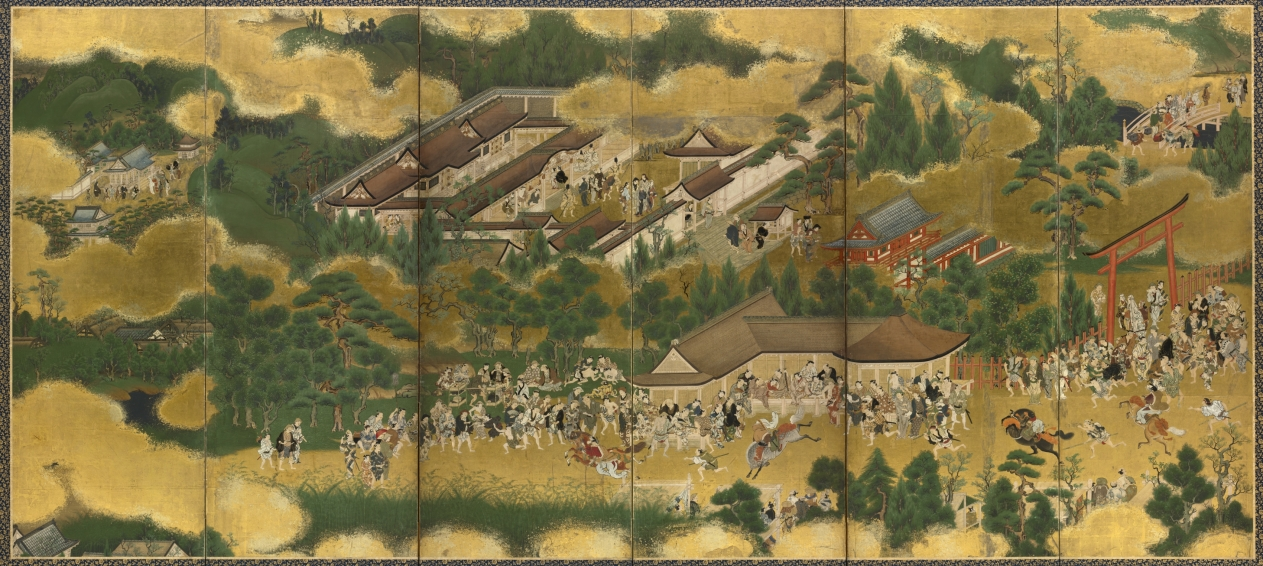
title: Horse Race at the Kamo Shrine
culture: Japan, Edo period (1615–1868)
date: early to mid-1600s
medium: One of a pair of six-panel folding screens; ink and color on gilded paper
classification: Painting